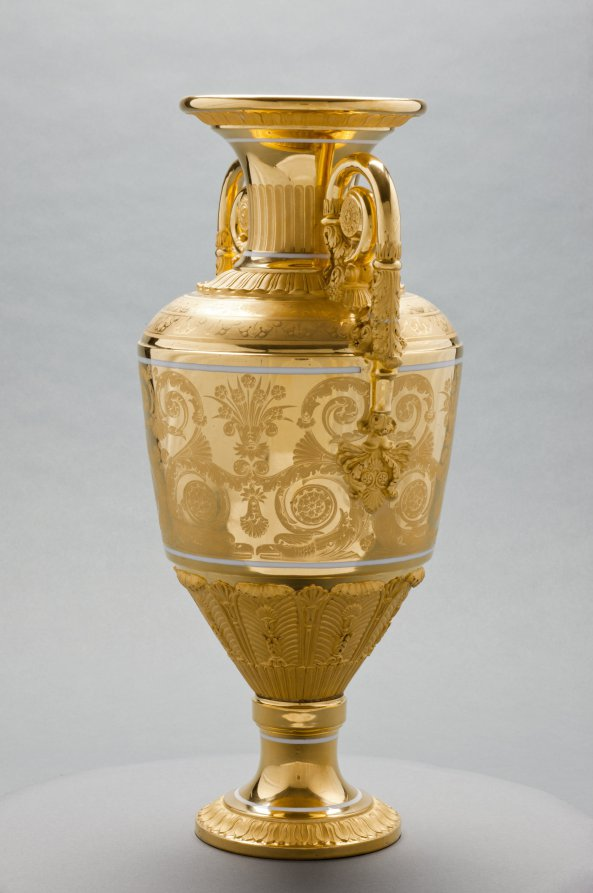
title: Vase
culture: Russia, St. Petersburg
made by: St. Petersburg Imperial Porcelain Factory (Russian)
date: c. 1820–1830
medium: gilt porcelain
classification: Ceramic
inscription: inscribed: "Moreau" in gold near lip.